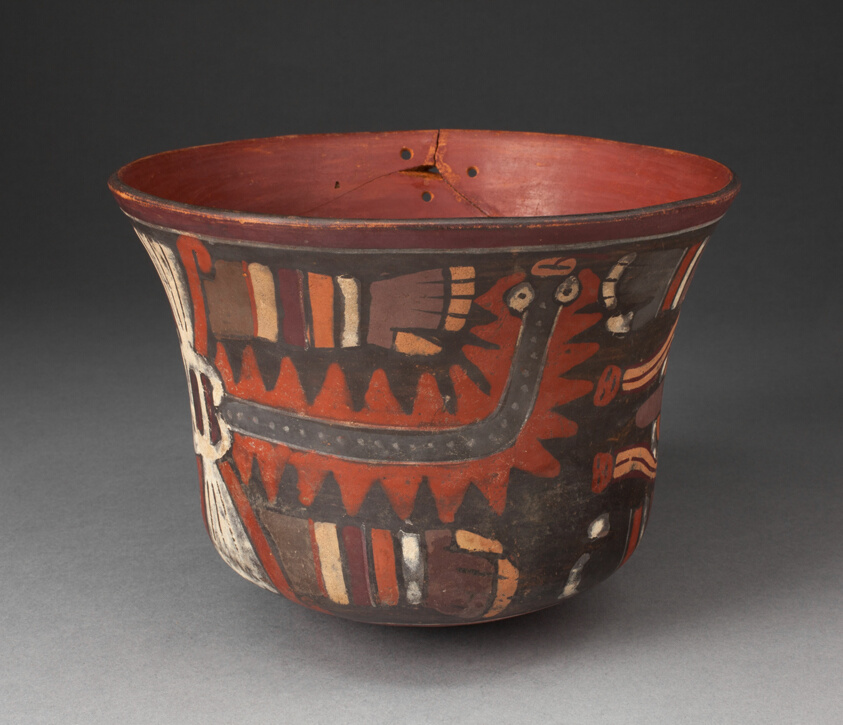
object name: Vessel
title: Vessel with Feline Supernaturals with Striped Arms, likely Pampas Cats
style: nazca, early intermediate period, Pre-Columbian, americas, Arts of the Americas, andean, andes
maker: Nazca; South coast, Peru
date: 180 BCE–500 CE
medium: Ceramic and pigment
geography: Peru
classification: earthenware; art of the americas; ceramics; vessel